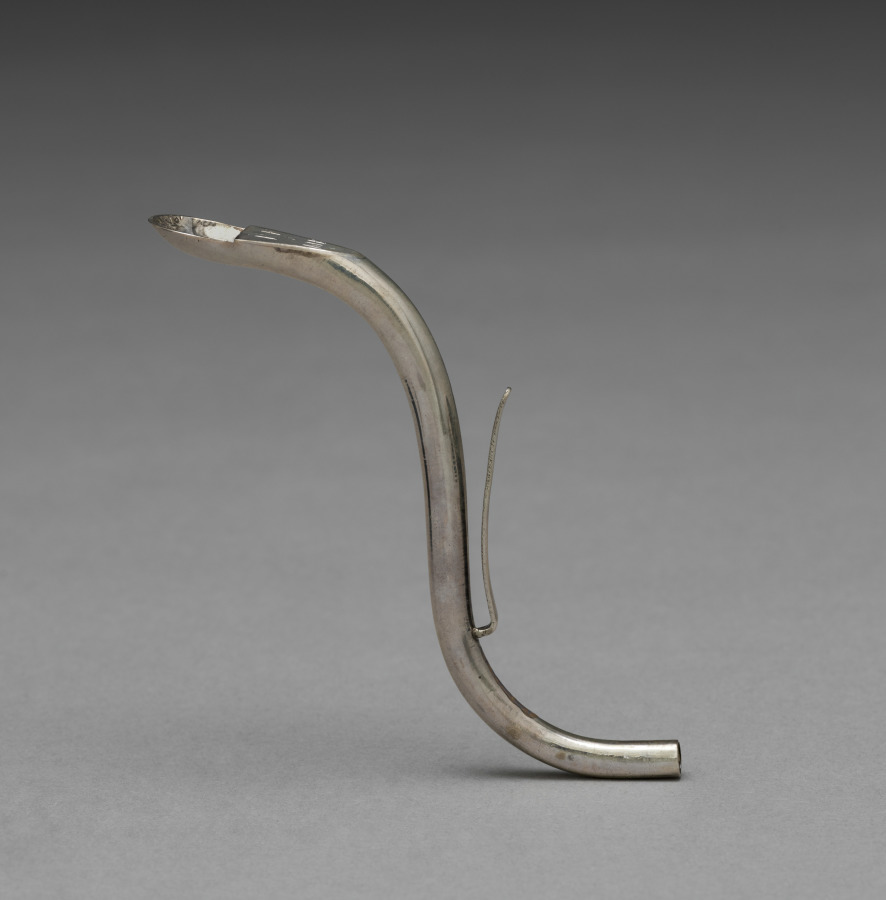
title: Feeding Tube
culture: America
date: 1700s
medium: silver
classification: Silver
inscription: "R.F/to/M.B" in block letters.